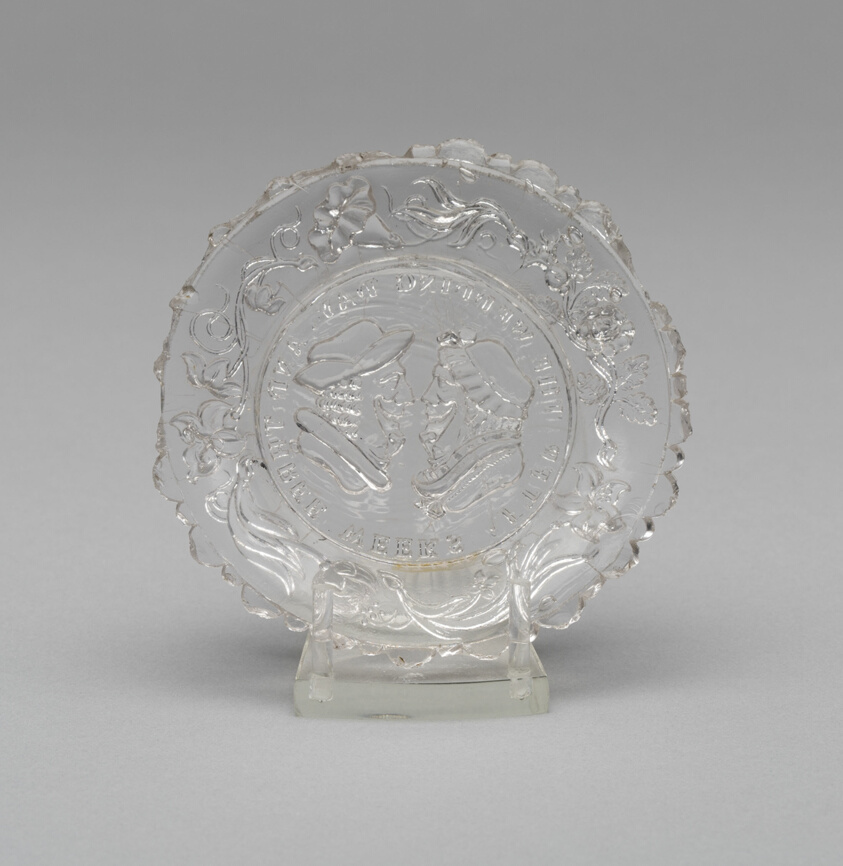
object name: Glass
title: Cup plate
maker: Artist unknown (American, 19th century)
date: 19th century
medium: Pressed glass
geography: United States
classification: plate (general, dish); glass; american decorative arts; american arts; decorative arts